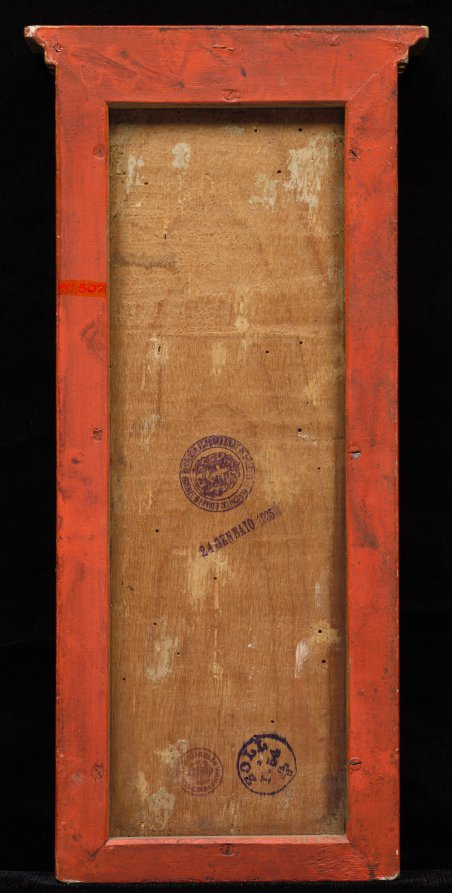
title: Saint in Red Cloak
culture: Italy, late 19th-early 20th century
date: late 19th - early 20th century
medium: tempera on panel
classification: Painting